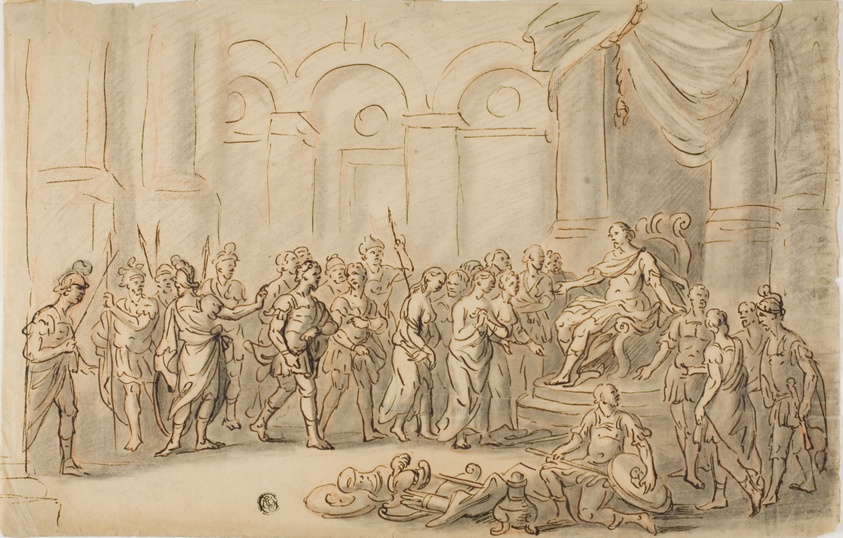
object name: Drawing and Watercolor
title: The Continence of Scipio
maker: Unknown Artist; Dutch 1700-1799,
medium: Pen and black ink, and black chalk, with stumping, over red chalk, on cream laid paper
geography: Holland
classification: pen and ink drawings; drawings (visual works); prints and drawing